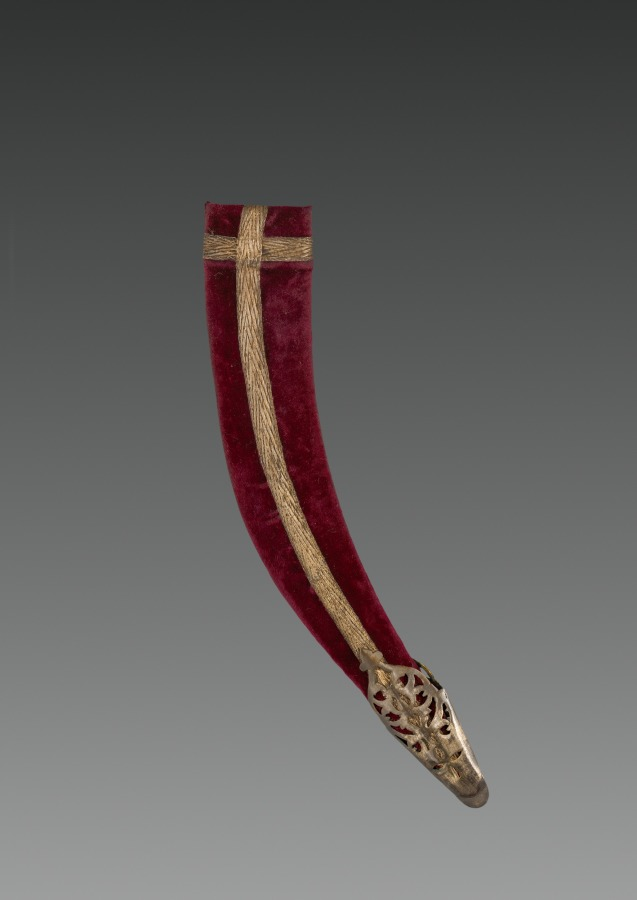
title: Dagger (red velvet case)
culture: India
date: 1700s–1800s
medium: Wood sheath covered in velvet with metallic thread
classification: Arms and Armor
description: Daggers with curved blades, known as khanjar, were worn tucked into the belt as one of the basic accessories for Mughal men. An all-purpose knife that could be used in hunting or fighting, the khanjar was also a visible status symbol. The use of jade and gold indicates that this dagger was owned by a member of the court. The gold inscriptions on the blade, just under the hilt, are quotations from the Qur’an, the most sacred book for Muslims. On one side is the opening line: “In the Name of God the Merciful and the Compassionate,” and on the other is a popular verse from chapter (sura) 61: “Help comes from God, and Victory is imminent.”